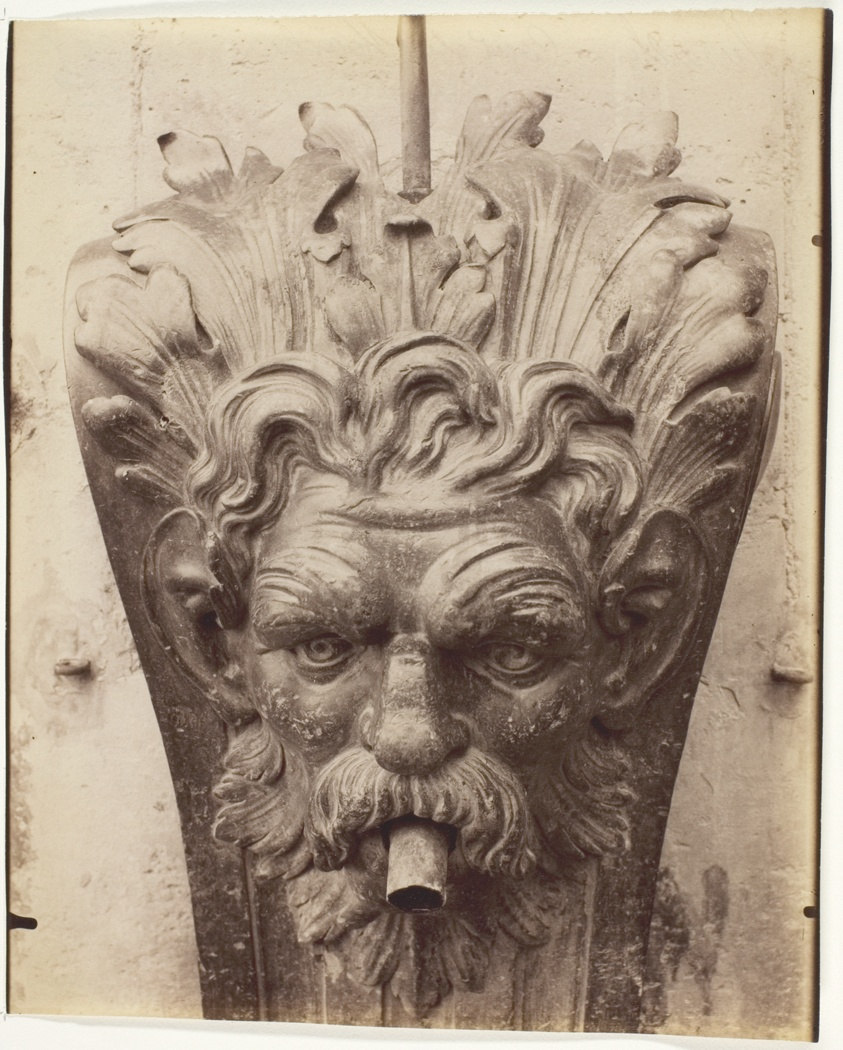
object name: Photograph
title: Versailles, Cour de Marbre, Fontaine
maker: Jean-Eugène-Auguste Atget (French, 1857–1927)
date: 1903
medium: Albumen print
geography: France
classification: albumen silver print; photographic process; photography; photograph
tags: Collected by Hugh Edwards